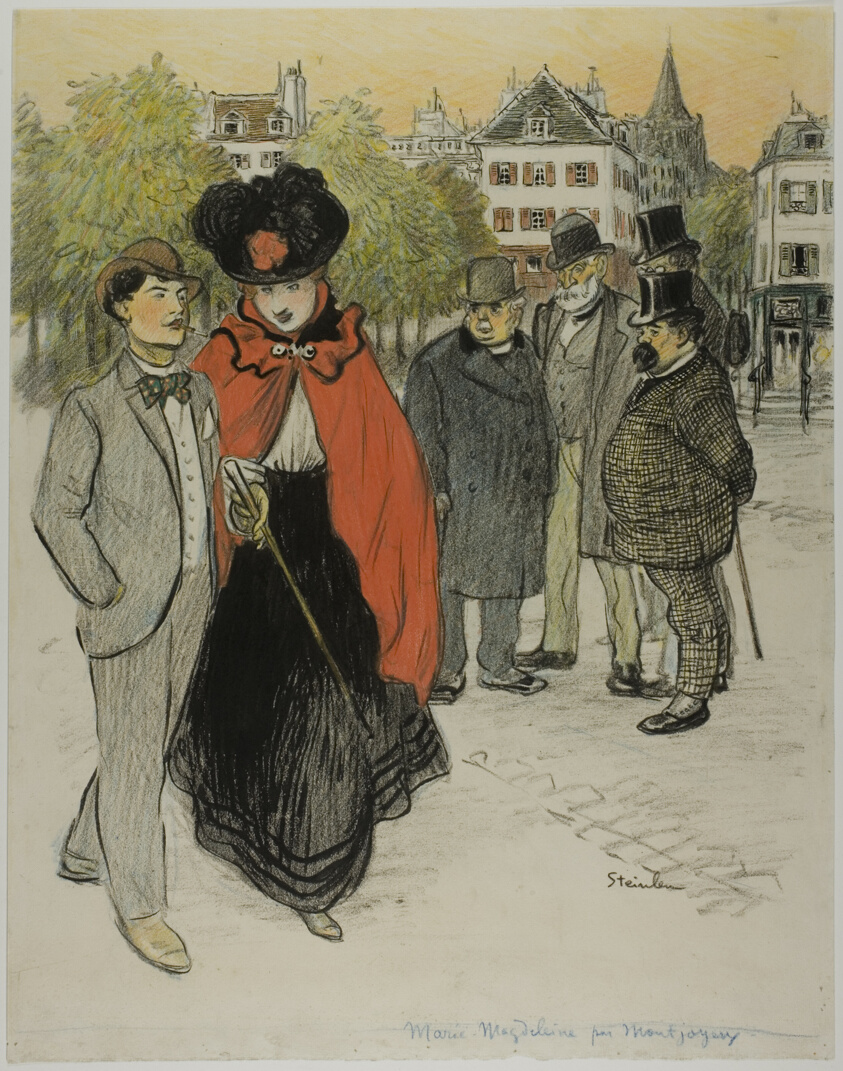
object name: Drawing and Watercolor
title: Gentleman Watching a Couple Promenading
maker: Théophile-Alexandre Steinlen; French, born Switzerland, 1859-1923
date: c. 1895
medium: Black and colored crayons, with brush and pen black ink, over incising on ivory wove paper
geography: France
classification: crayon; drawings (visual works); prints and drawing